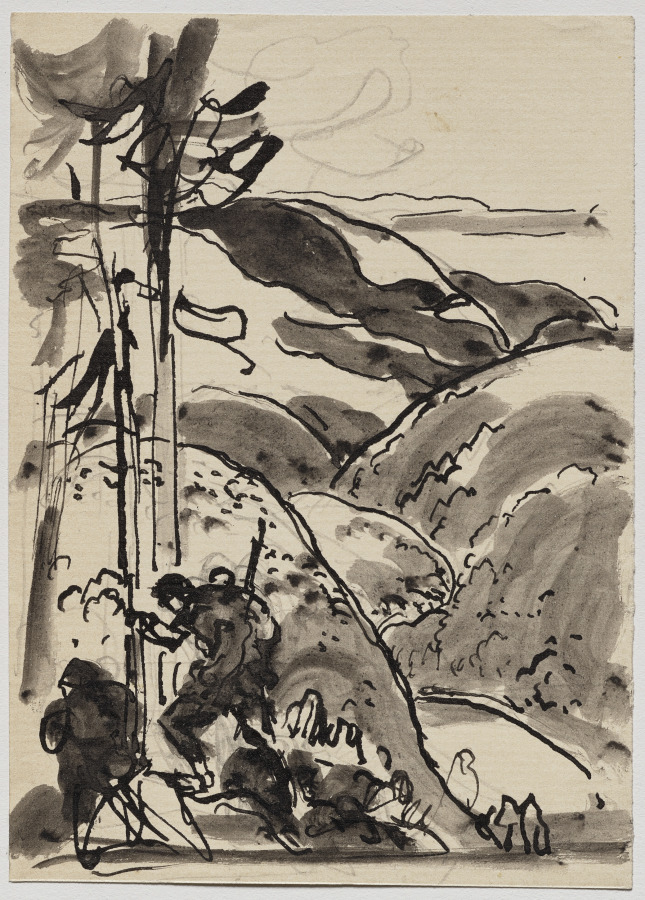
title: Dans les Vosges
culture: France, 20th century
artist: Auguste Louis Lepère (French, 1849–1918)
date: 1914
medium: brush and black ink over pencil with white highlights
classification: Drawing